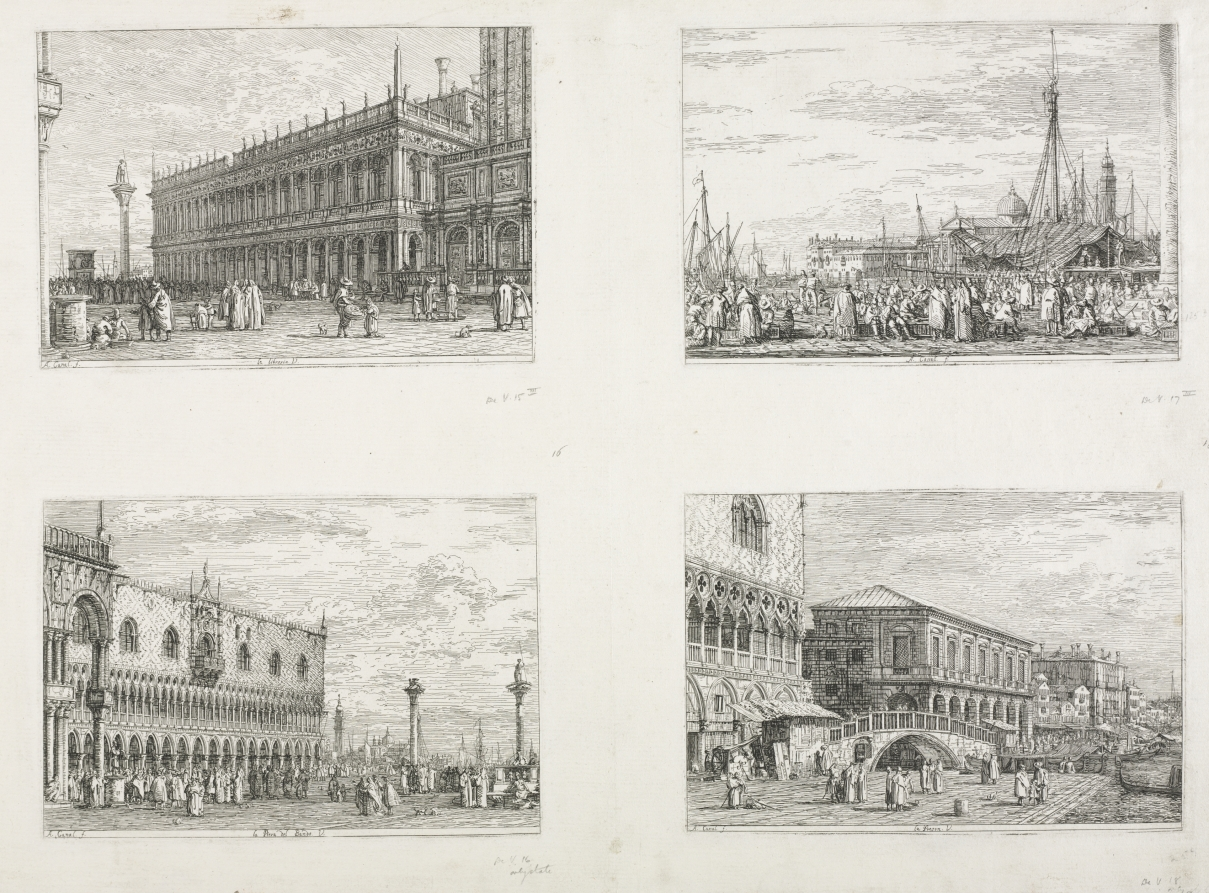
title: Views: The Stone of Proclamation at Venice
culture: Italy, Venice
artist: Antonio Canaletto (Italian, 1697–1768)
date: 1735–1746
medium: etching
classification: Print